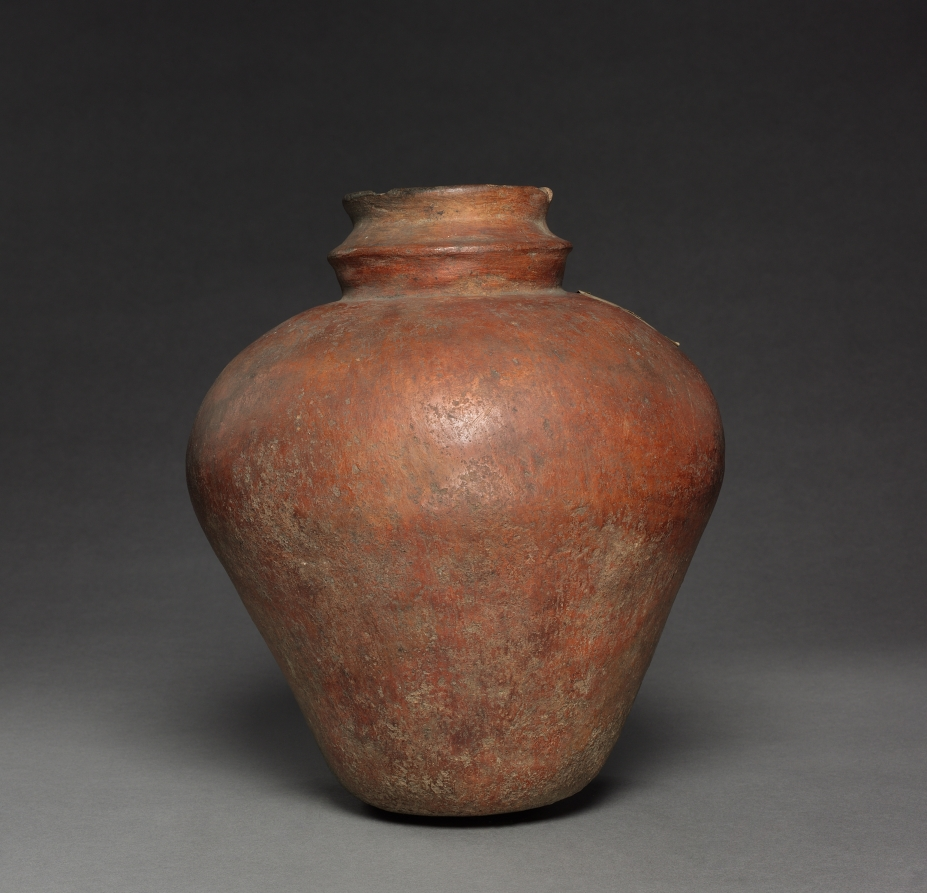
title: Vase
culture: Colombia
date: before 1921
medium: pottery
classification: Ceramic